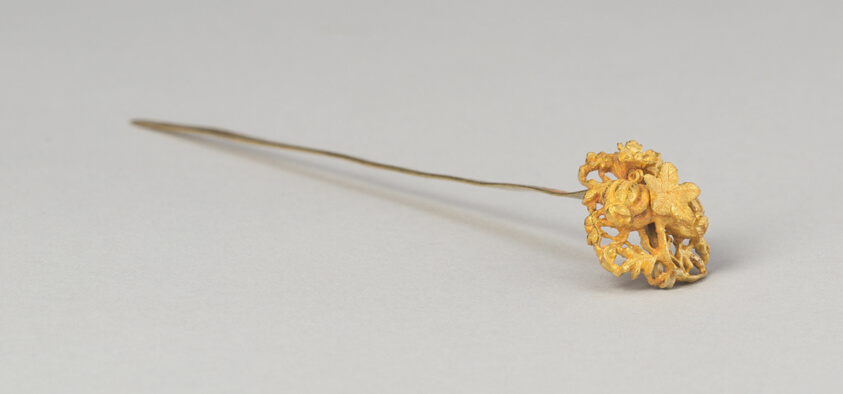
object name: Costume and Accessories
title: Hairpin with Vine Scroll, with Melons, Star-shaped Leaf, and Blossoms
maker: China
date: Song/Jin dynasty, 12th/13th century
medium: Gold repoussé; openwork with hammered and chased details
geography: China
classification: jewelry; costume